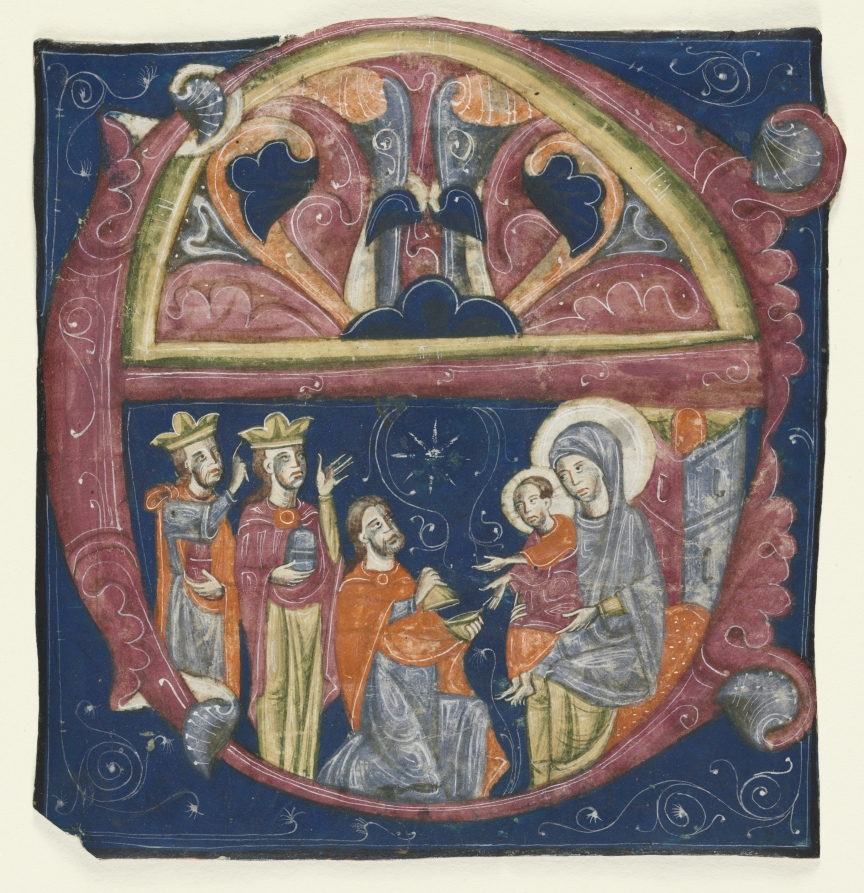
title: Historiated Initial (E) Excised from a Gradual: Adoration of the Magi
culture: Italy, Siena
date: c. 1200–1240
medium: ink, tempera, and gold on parchment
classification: Manuscript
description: All the essential narrative elements—Mary, the infant Jesus, and the three Magi—are tucked into the lower body of the initial E. Although the initial is now separated from its original context in a gradual, or choir book, it would have marked the beginning of a new chant. In this case it is for the feast of Epiphany (January 6), which celebrates the arrival of the Magi in Bethlehem to see the newborn Christ. The Introit for that Mass begins: Ecce advenit dominator Dominus. . . . (Behold the lord the ruler is come. . . .).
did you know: X-ray fluorescence analysis is a nondestructive technique used to determine the elemental composition of materials. On this leaf it revealed that the dark blue pigment contains azurite.